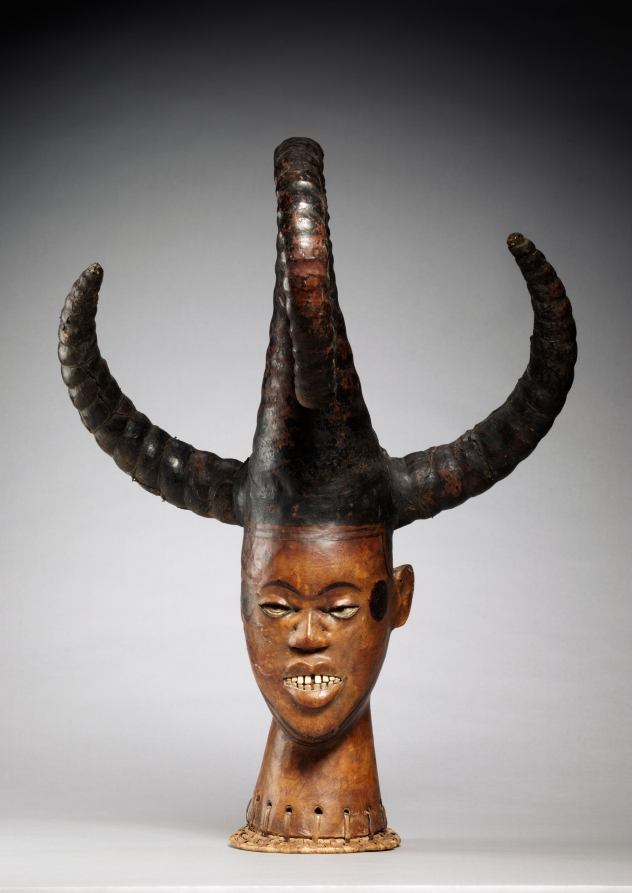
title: Headdress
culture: Africa, West Africa, Nigeria, Ejagham-style maker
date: early 1900s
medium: Wood, rawhide, cane, paint, bone or ivory, natural fiber, and metal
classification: Mask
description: Headdresses or crest masks made of antelope skin stretched over a carved head are a distinctive art form of the Cross River region in southeastern Nigeria and western Cameroon. This female evocation of ideal feminine beauty was most probably worn by an Ejagham woman in the context of a female society called Ekpa, which was responsible for the education of girls in preparation for marriage.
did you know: The headdress represents a girl that evokes ideal female beauty and is ready for marriage. The depicted hairstyle was worn during the coming-out ceremony following the girls’ seclusion.